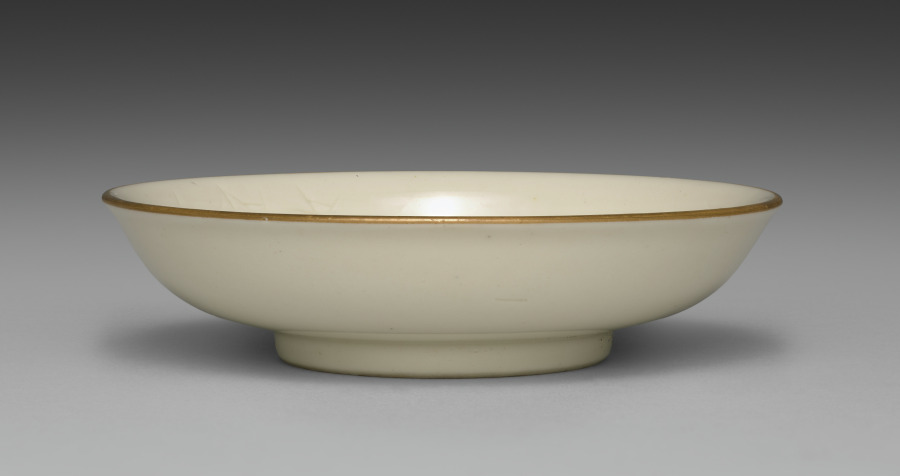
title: Small Dish from Dining Set with Plum Blossoms and Cracked-Ice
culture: Japan, Meiji period (1868–1912)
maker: Seifū Yohei II (Japanese, 1844–1878)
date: c. 1875–78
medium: Porcelain with molded designs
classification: Ceramic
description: Each item in this set has a delicate low-relief design of flowering plum branches over scattered, intersecting lines meant to resemble the cracked-ice surface of a frozen body of water and is signed on the base in gold pigment. While Yohei II produced many fine works in underglaze blue, like those produced by Kiyomizu Shichibei, he also made works in quite different styles later in his career, from the early 1870 s. In 1873, he was appointed purveyor to the Industrial Center of Kyoto Prefecture, a designation associated with Kyoto’s efforts to reach an international market through the port of Kobe; and from 1875 until his death, he was involved in national-level projects to present Japanese ceramics across the world. It was during this period that Yohei III was apprenticed to Yohei II, and it has been suggested that this set may in fact be an early example of Yohei III’s work, which he signed with his teacher’s name. Decorated with flowers resembling Japanese textile motifs, the set calls to mind the design of Yohei II’s pair of vases with plum blossoms in the Victoria and Albert Museum. Here, the elaborate trees created for a formal public exhibition setting have been translated into the approachable blossoms of the genteel domestic environment. While the designs are consistent across the pieces, each raised flower petal and pistil and each incised line in the ice was done by hand, so the cups, bowls, and dishes are similar yet unique. The bottoms of two boxes once identified the set’s owner, but the information has been deliberately obscured with black ink. However, inscriptions still visible appear to indicate two occasions, once at the end of July 1886 , and once again in June 1916 , when parts of the set were requested from Hokura in Niigata Prefecture. The location corresponds to a neighborhood in the present-day city of Jōetsu. The surname Tsuji 辻 also appears on a paper tag affixed to one of the box cloths. Future research may possibly reveal more about their provenance. A vase by Yohei III in a private collection combines the formal grandeur of the Yohei II vases in the Victoria and Albert Museum with the gentler design of this dining set, placing flowering plum trees against soft, scalloped-edge clouds resembling those in golden screens.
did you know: The dining wares have a creamy white coloration that the four boxes containing them identify as Korean in style.